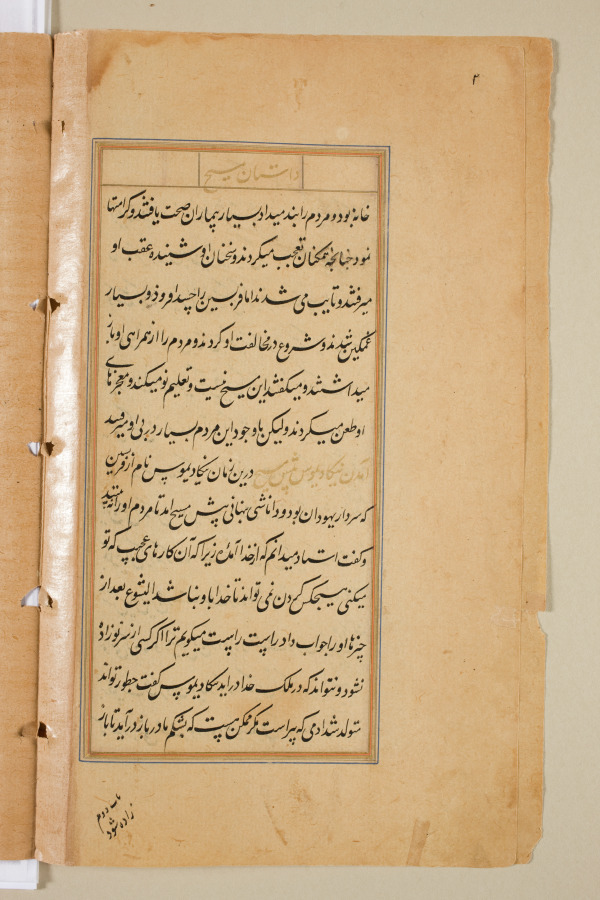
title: Text page from a Mirror of Holiness (Mir’at al-quds) of Father Jerome Xavier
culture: Mughal India, Allahabad, made for Prince Salim (1569–1627)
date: 1602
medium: Ink and gold on paper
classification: Manuscript